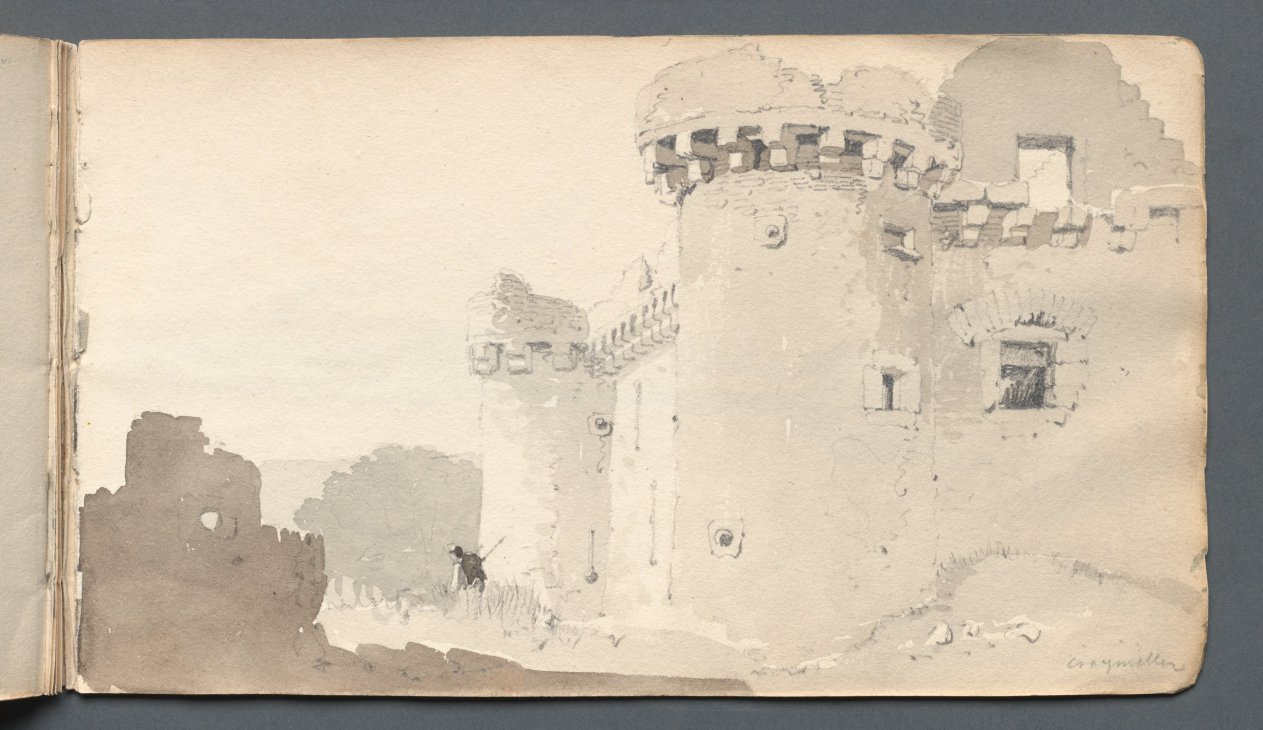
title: Sketchbook: "Ruined Castle"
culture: England, 19th century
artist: Samuel Prout (British, 1783–1852)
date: 1814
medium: graphite with gray and brown wash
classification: Bound Volume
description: John Ruskin (also in this gallery) admired Prout’s strength as a draftsman. Like the topographical watercolorists of the 18th century, Prout emphasized form over color in his watercolors, as is evident in the monochromatic, delicate English views in this sketchbook.